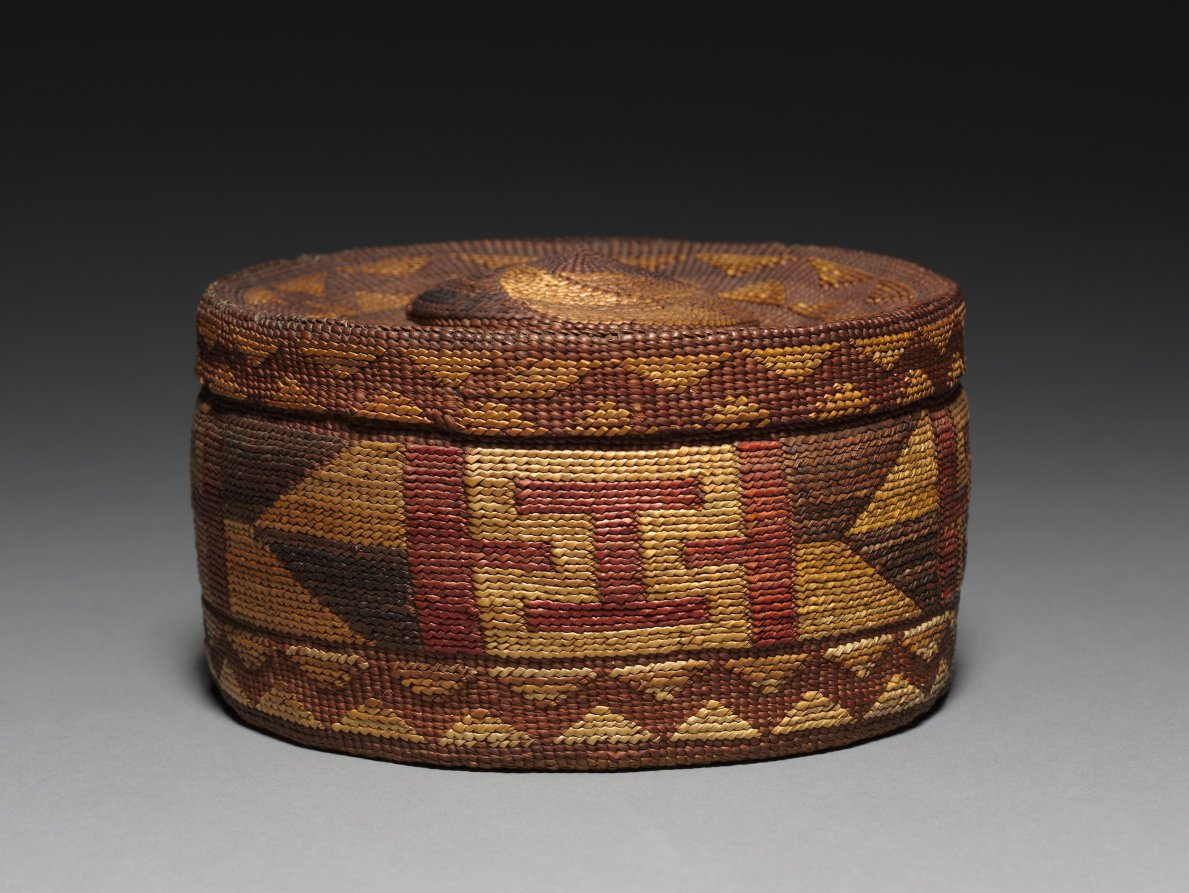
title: Basket with Rattle Top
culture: Northwest Coast, Tlingit, 20th century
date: before 1929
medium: twined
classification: Basketry